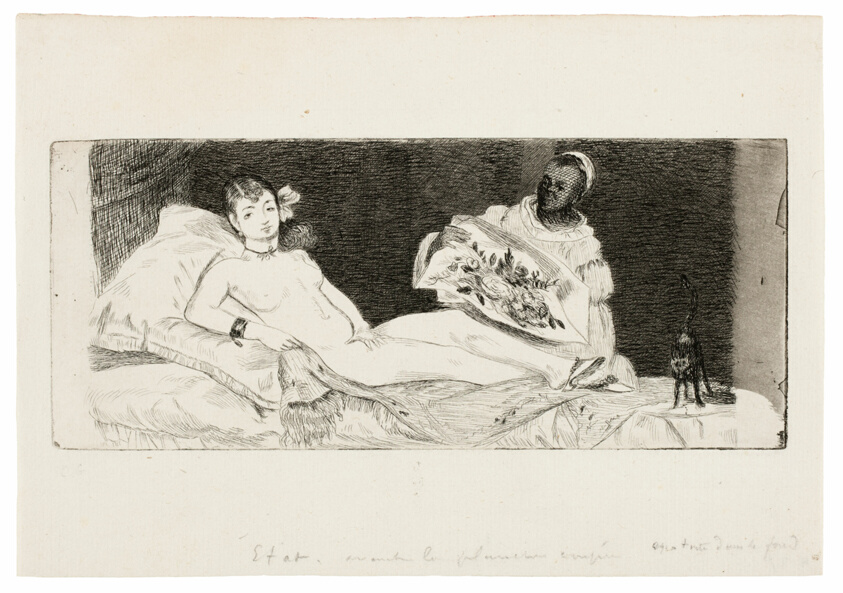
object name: Print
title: Olympia (published plate)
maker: Édouard Manet (French, 1832-1883)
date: 1867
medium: Etching and aquatint in black on cream laid paper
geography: France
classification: etching; print; prints and drawing